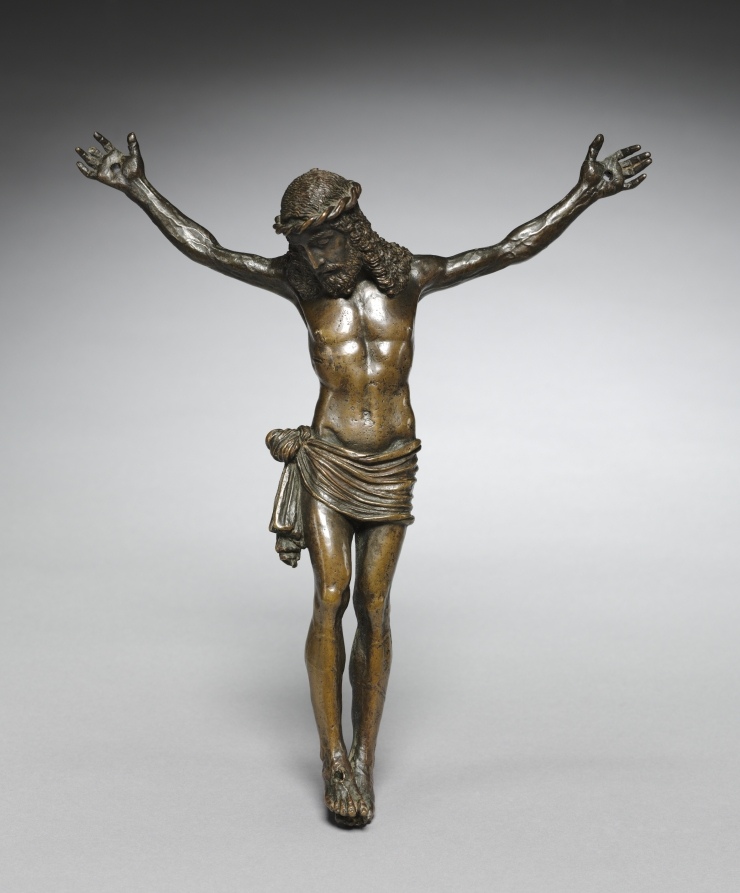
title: Crucified Christ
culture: Italy, Ravenna, 16th century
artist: Severo da Ravenna (Italian, c.1496–c.1543)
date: c. 1500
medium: bronze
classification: Sculpture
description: The highly finished surface of this sculpture, including the back, suggests it belonged to a refined collector. Small sculptures would often be held to admire details such as the strands of hair streaming onto Christ’s shoulders, the prominent veins in his forearms, and the intricate knotted cloth at his side.